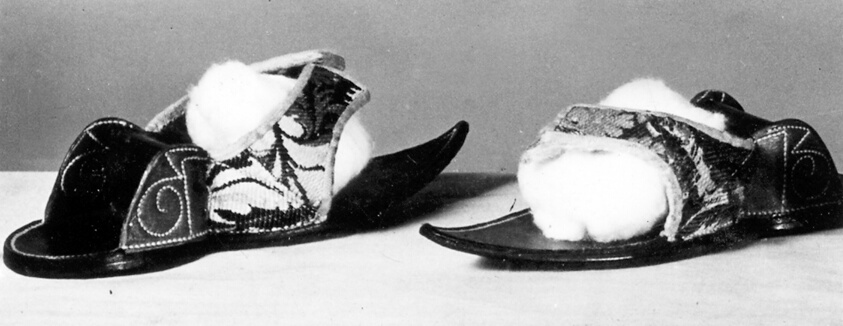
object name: Textile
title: Pair of Pattens (Overshoes)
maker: England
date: 1720s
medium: Leather, silk, plain weave; brocaded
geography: England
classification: textile; shoes - misc; costume accessory - shoe